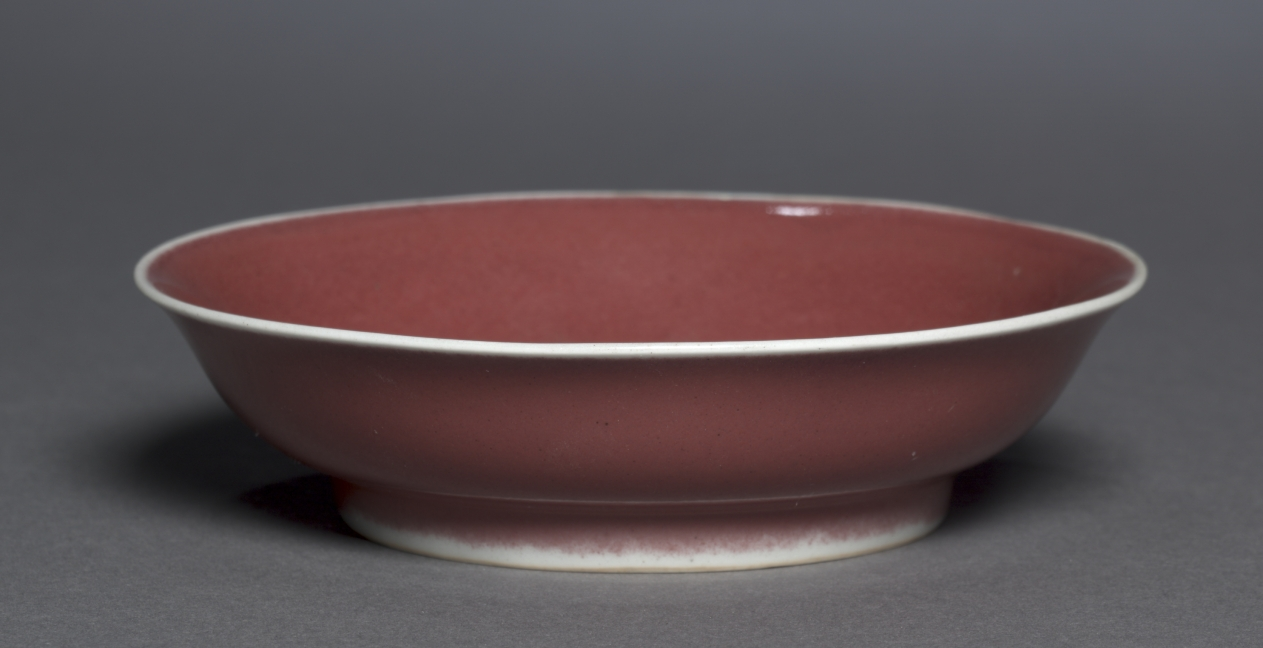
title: Dish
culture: China, Jiangxi province, Jingdezhen, Ming dynasty (1368-1644), Xuande mark and period (1426-1435)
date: 1426–35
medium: porcelain with copper-red glaze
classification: Ceramic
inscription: 大明宣德年製